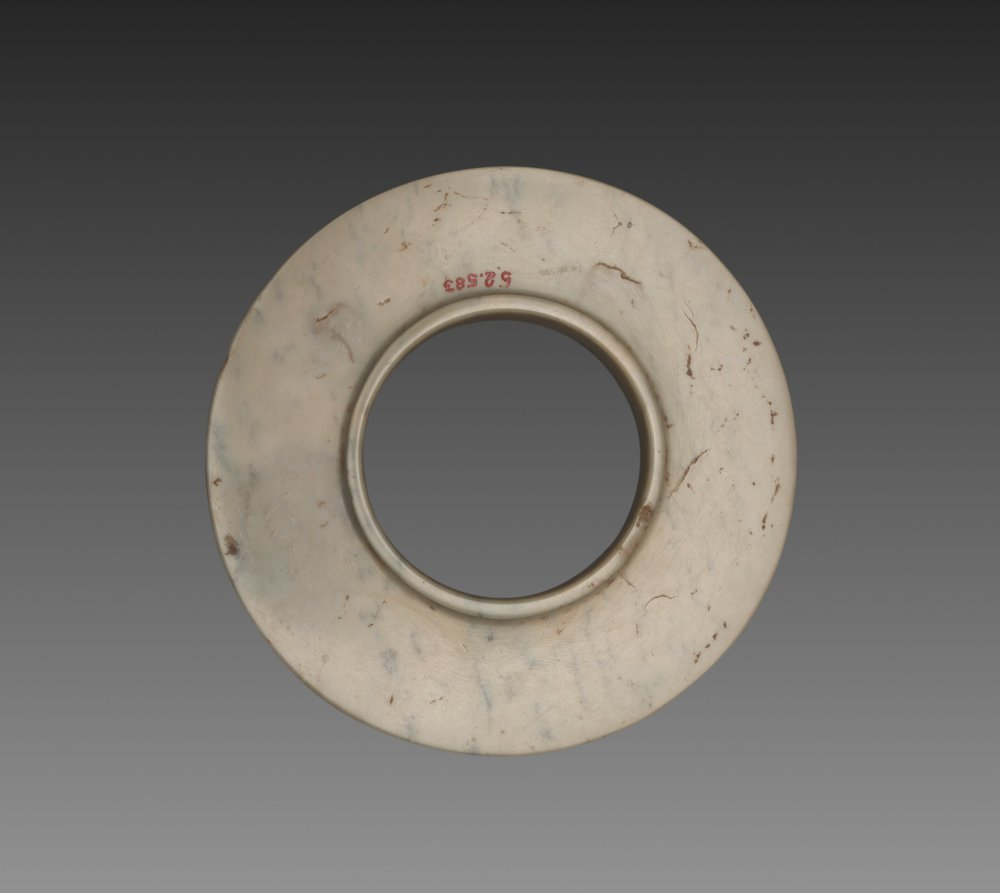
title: Collared Disk (Huan)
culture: China, Shang dynasty (c. 1600–c. 1046 BCE)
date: c. 1600–1050 BCE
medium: jade (nephrite)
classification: Jade